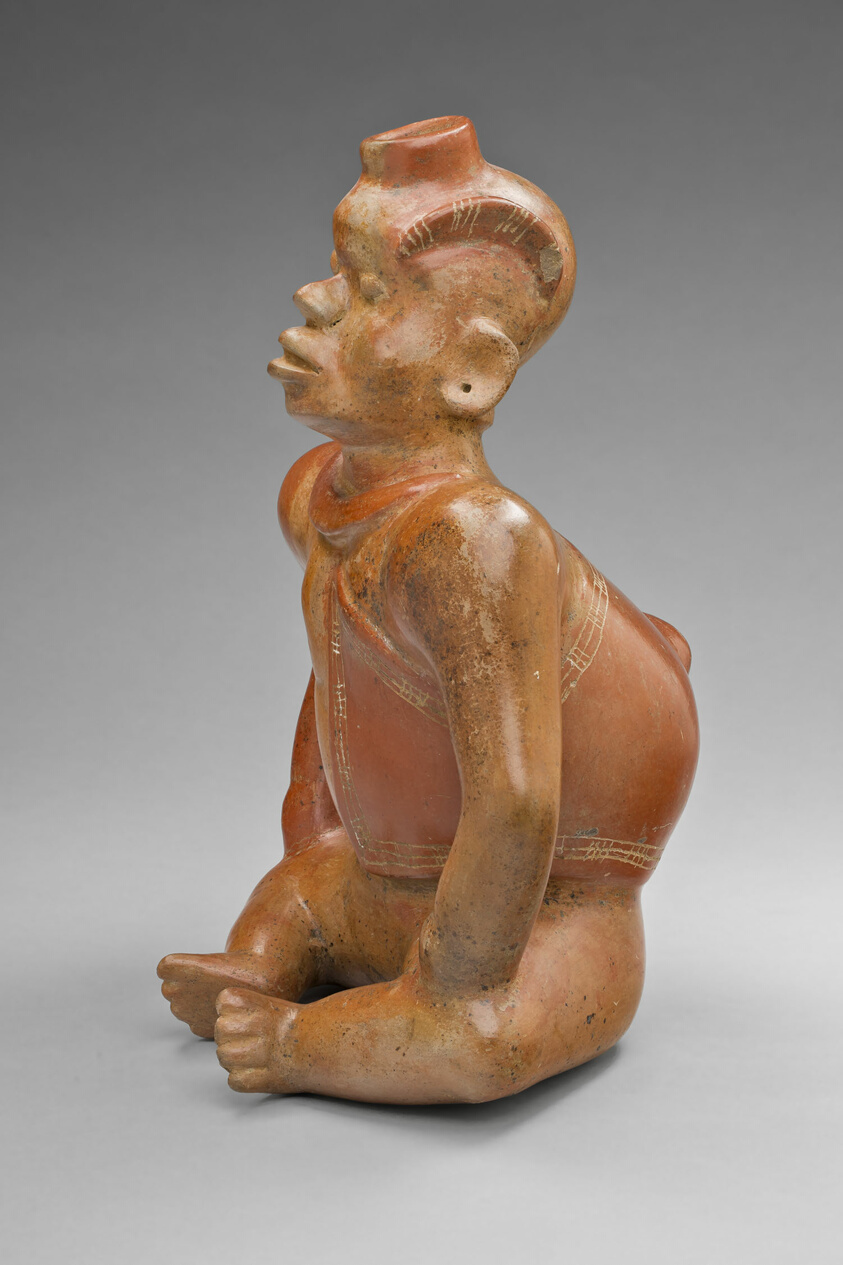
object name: Vessel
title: Vessel in the Form of a Seated Hunchback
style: colima, mesoamerican, Arts of the Americas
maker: Colima (Colima, Mexico)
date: 100 BCE–250 CE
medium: Ceramic and pigment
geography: Colima state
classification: vessel; art of the americas; ceramics